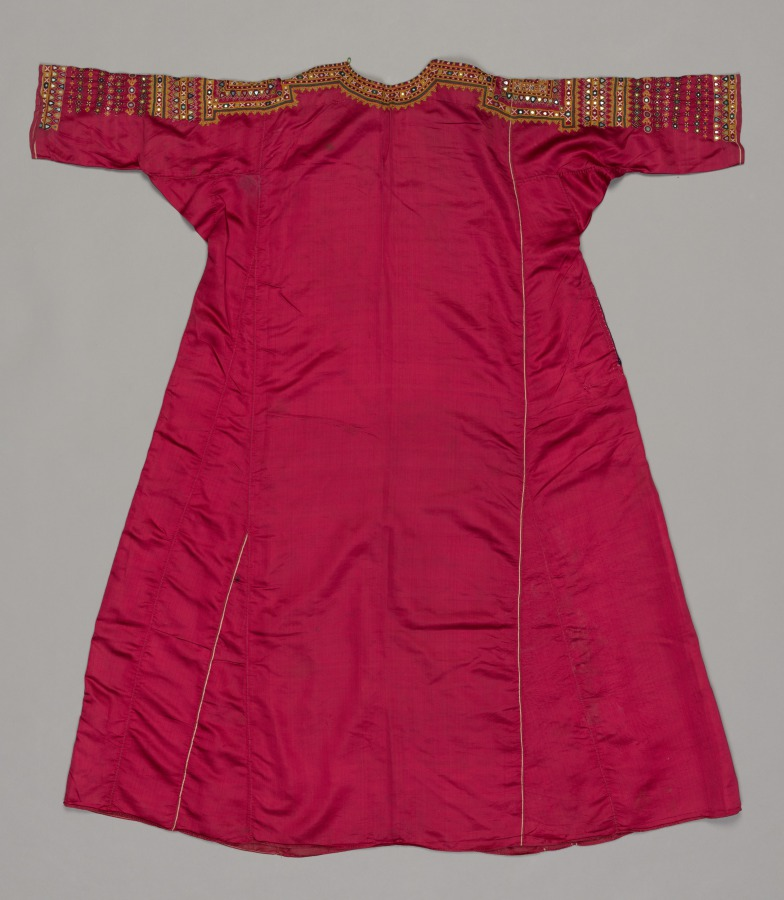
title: "Aba": Woman's Dress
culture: Western India, Gujarat, Kachchh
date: late 1800s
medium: silk on silk satin with mirror-glass inserts, embroidery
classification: Garment